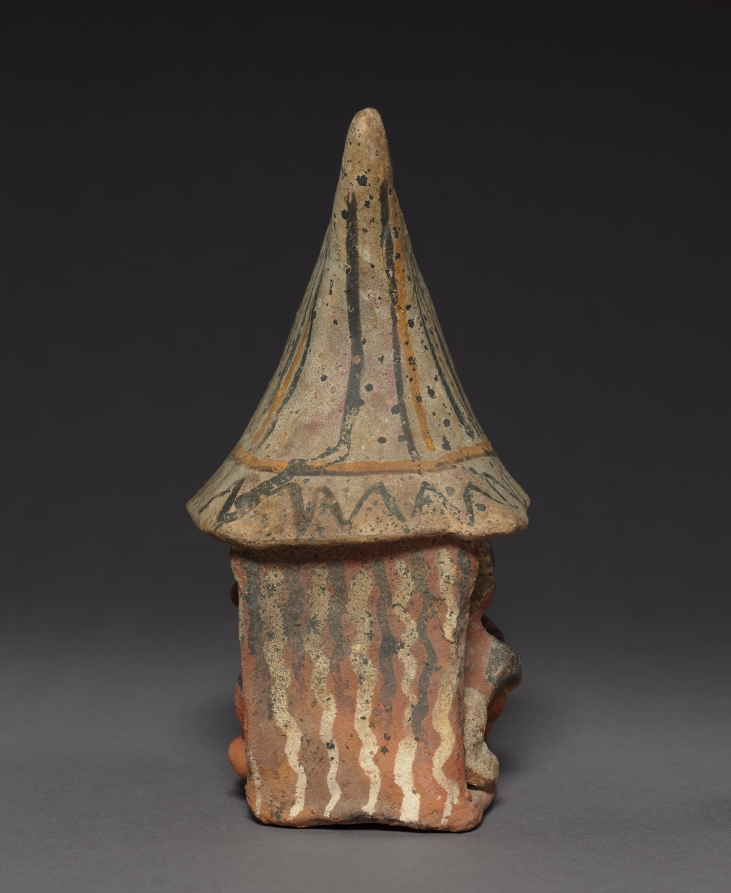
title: Architectural Scene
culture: Mesoamerica, West Mexico, Nayarit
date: 200 BCE–300 CE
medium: ceramic, pigment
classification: Sculpture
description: This scene, which shows several people inside a structure, is a compact version of larger, more elaborate examples. Like them, it could depict festivities held to commemorate one of life’s milestones, such as marriage or the coming of age.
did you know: This scene may depict festivities held to commemorate one of life’s milestones, such as marriage.